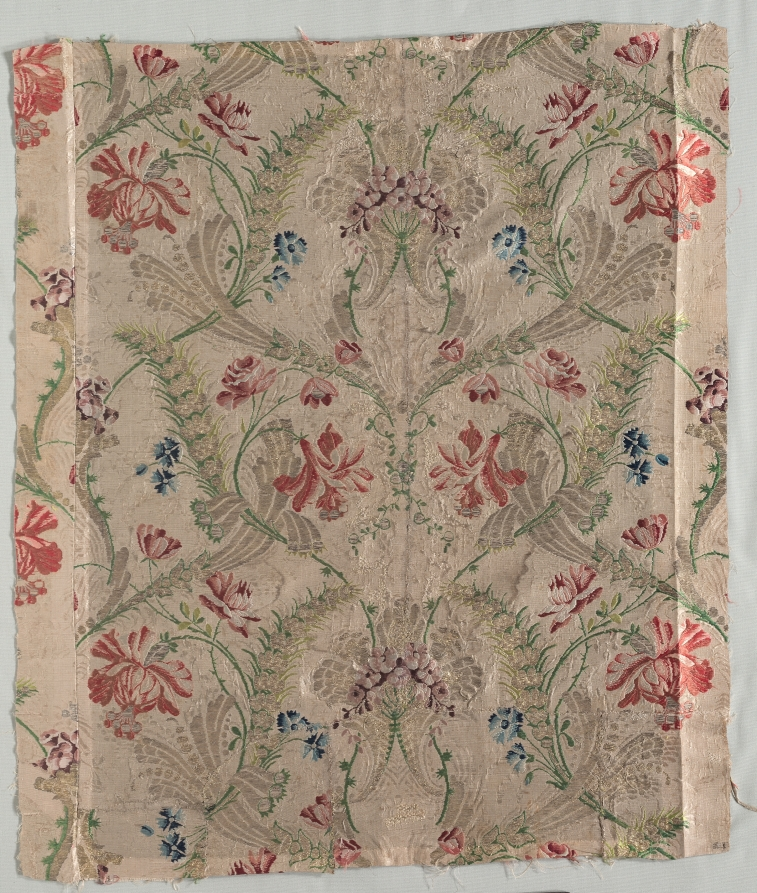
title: Brocaded Silk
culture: France, early 18th century, late Baroque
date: early 1700s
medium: plain compound cloth, brocaded; silk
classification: Textile